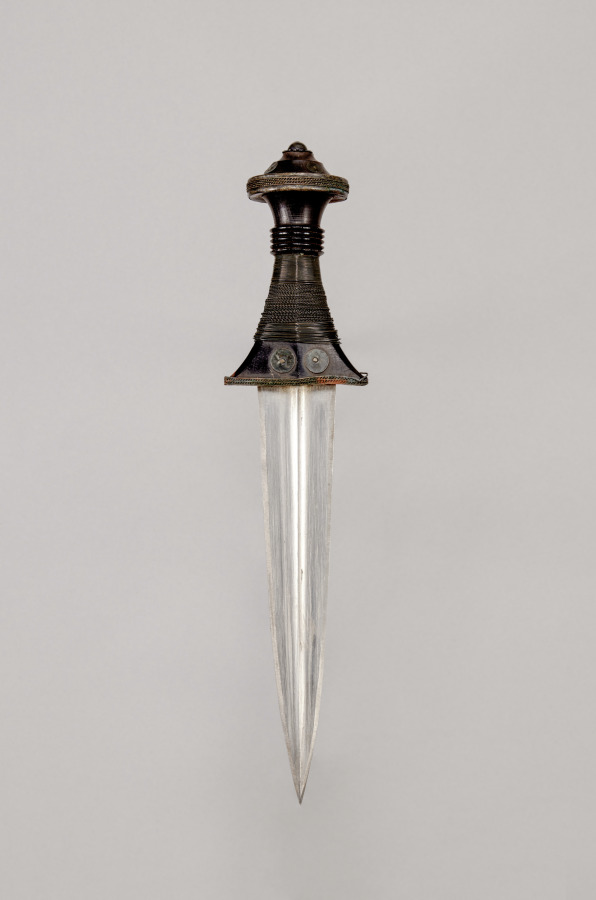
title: Dagger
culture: Africa, East Africa, Sudan, unknown maker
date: 1880–1910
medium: metal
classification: Arms and Armor